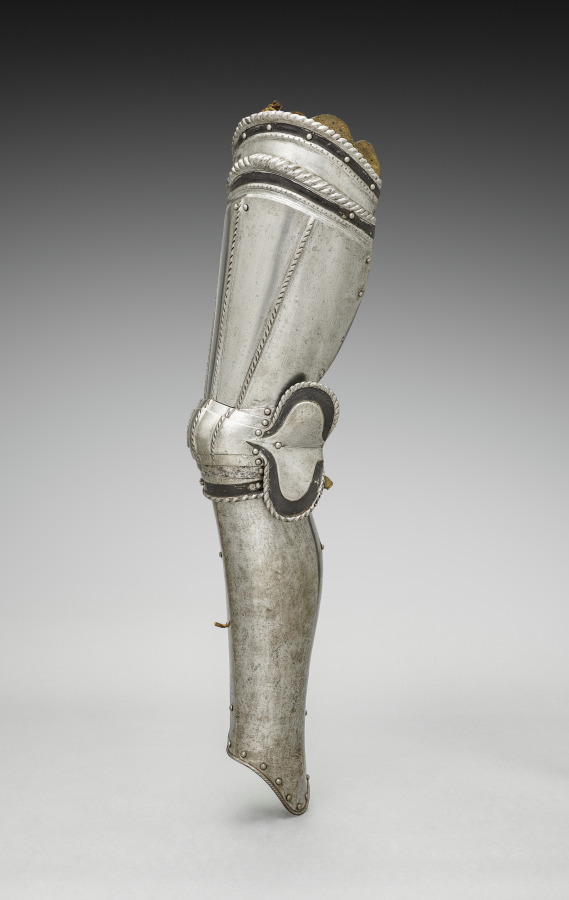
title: Left Leg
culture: Germany, 19th century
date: 1801–1900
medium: steel with black paint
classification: Arms and Armor